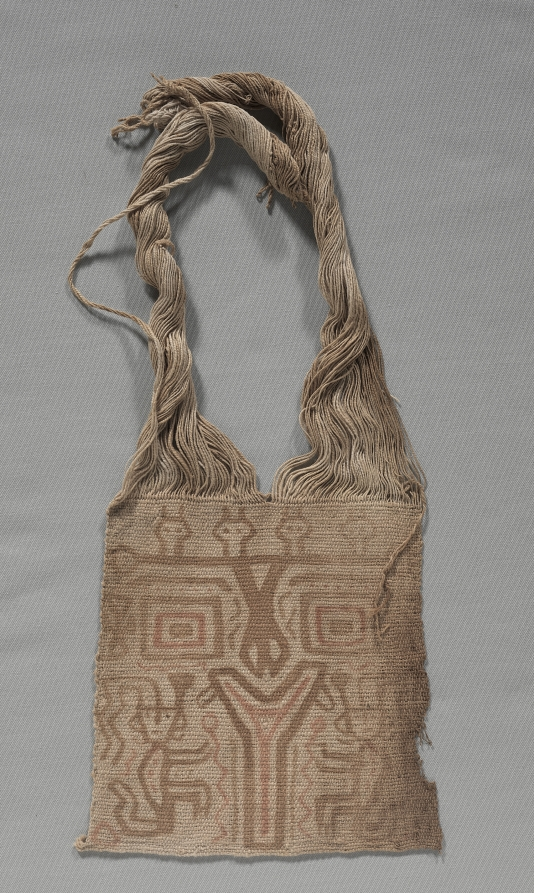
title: Mummy Bundle "Mask"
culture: Peru, South Coast, Ica Valley, Ocucaje site, Paracas style (700 BCE–1 CE)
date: 400–200 BCE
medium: Cotton and pigment; plain weave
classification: Textile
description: The Paracas people buried their dead in bundles that they created by carefully wrapping the seated human body in layers of garments and other textiles. In some cases, they placed a painted cloth—such as these examples—on the outer layer and at the top of the bundle. The hair-like yarns (unwoven warps) were arranged around a solid cotton disk that was sometimes wrapped with a headband. The cloths, then, seem to have functioned as the bundle’s head, even though some are painted not with faces but with complete figures whose supernatural character is marked by the appendages streaming from their bodies.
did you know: These masks fall into two categories, those with only a face and those with a full-bodied figure.